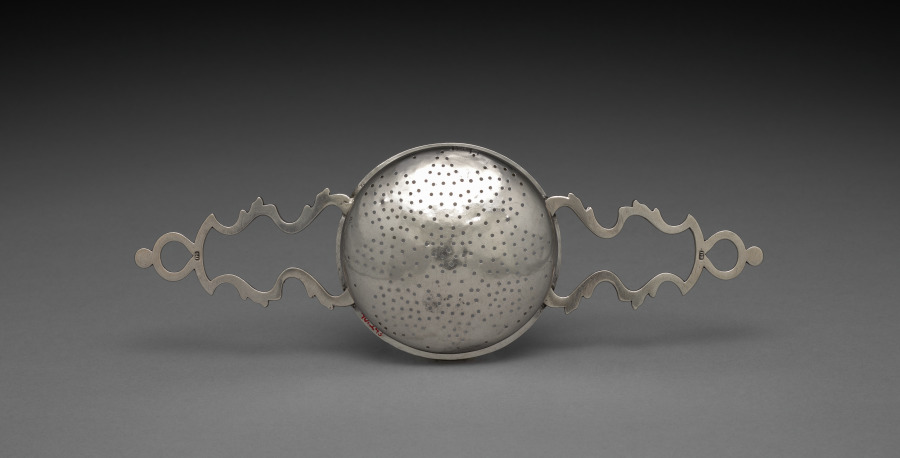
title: Strainer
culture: America, Massachusetts, Boston and Salem, 18th century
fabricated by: Daniel Parker (American, 1726–1785)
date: c. 1765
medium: silver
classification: Silver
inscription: engraved "H" over "B + H" in shaded block letters on side of bowl.